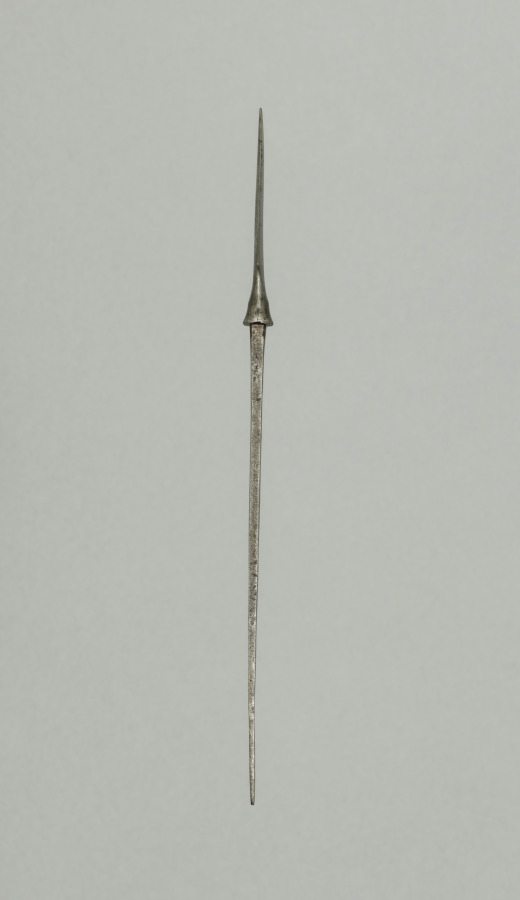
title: Arrow Point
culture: Japan, Edo period (1615–1868)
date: 1700s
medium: steel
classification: Arms and Armor